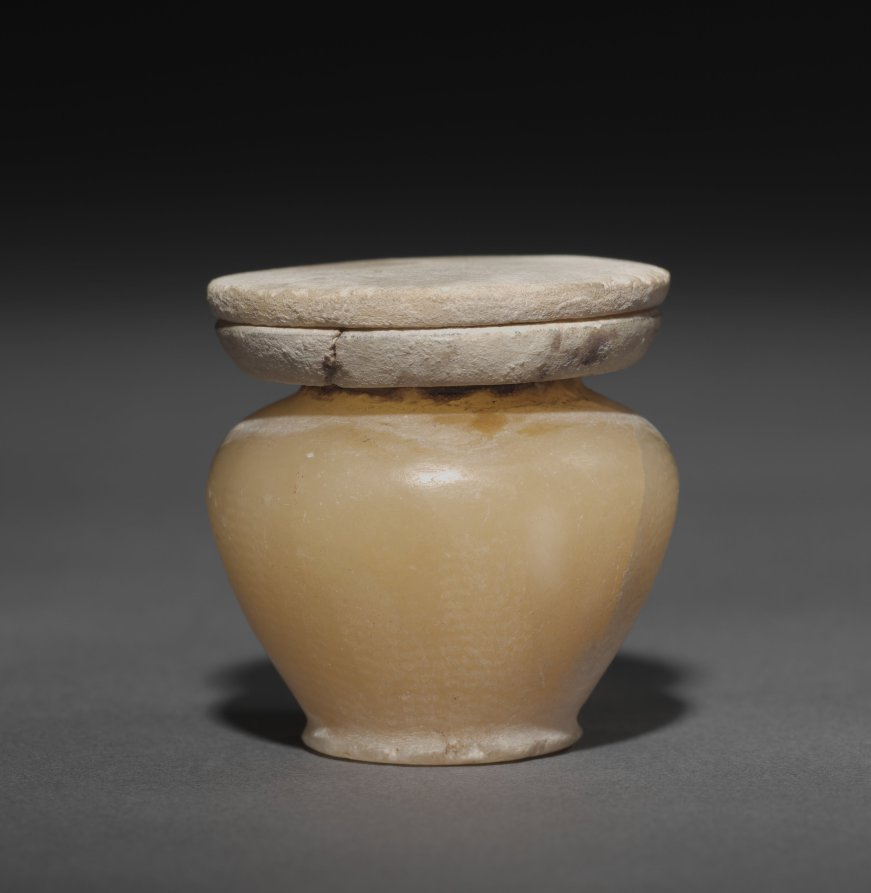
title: Kohl Jar with Lid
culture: Egypt, Middle Kingdom (2040–1648 BCE), Dynasty 12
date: 1980–1801 BCE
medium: travertine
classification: Vessels